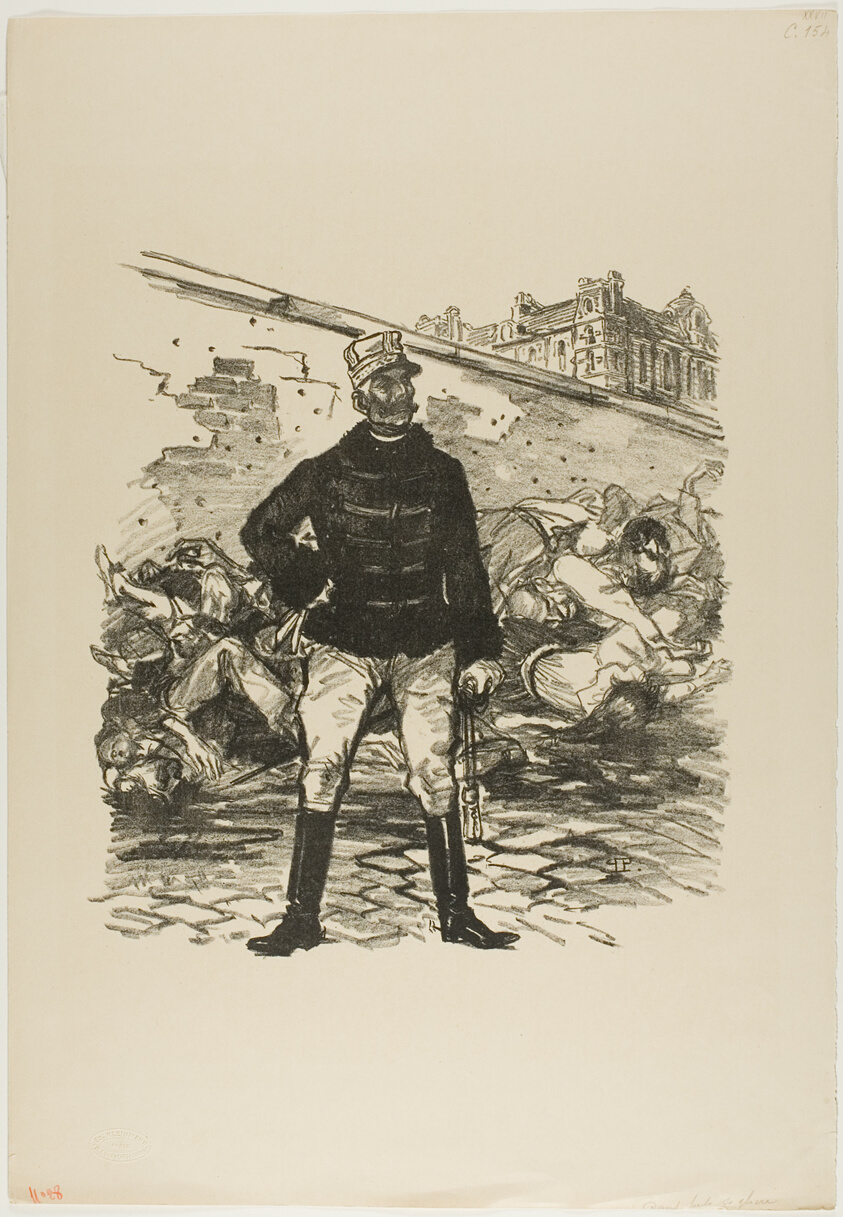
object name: Print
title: In All His Glory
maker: Théophile-Alexandre Steinlen; French, born Switzerland, 1859-1923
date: June 1894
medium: Lithograph in black on cream wove paper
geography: France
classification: lithograph; print; prints and drawing